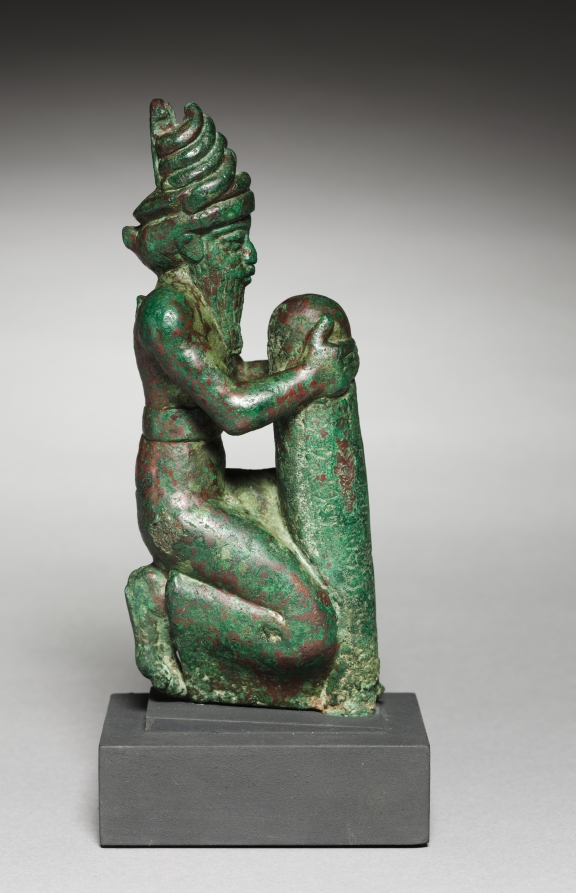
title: "Foundation Nail" of Gudea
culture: Mesopotamia, Neo-Sumerian, Iraq, probably Lagash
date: c. 2100 BCE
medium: copper alloy, lost-wax cast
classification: Sculpture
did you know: The ruler Gudea placed one of these special nails in every temple he built in order to commemorate it.